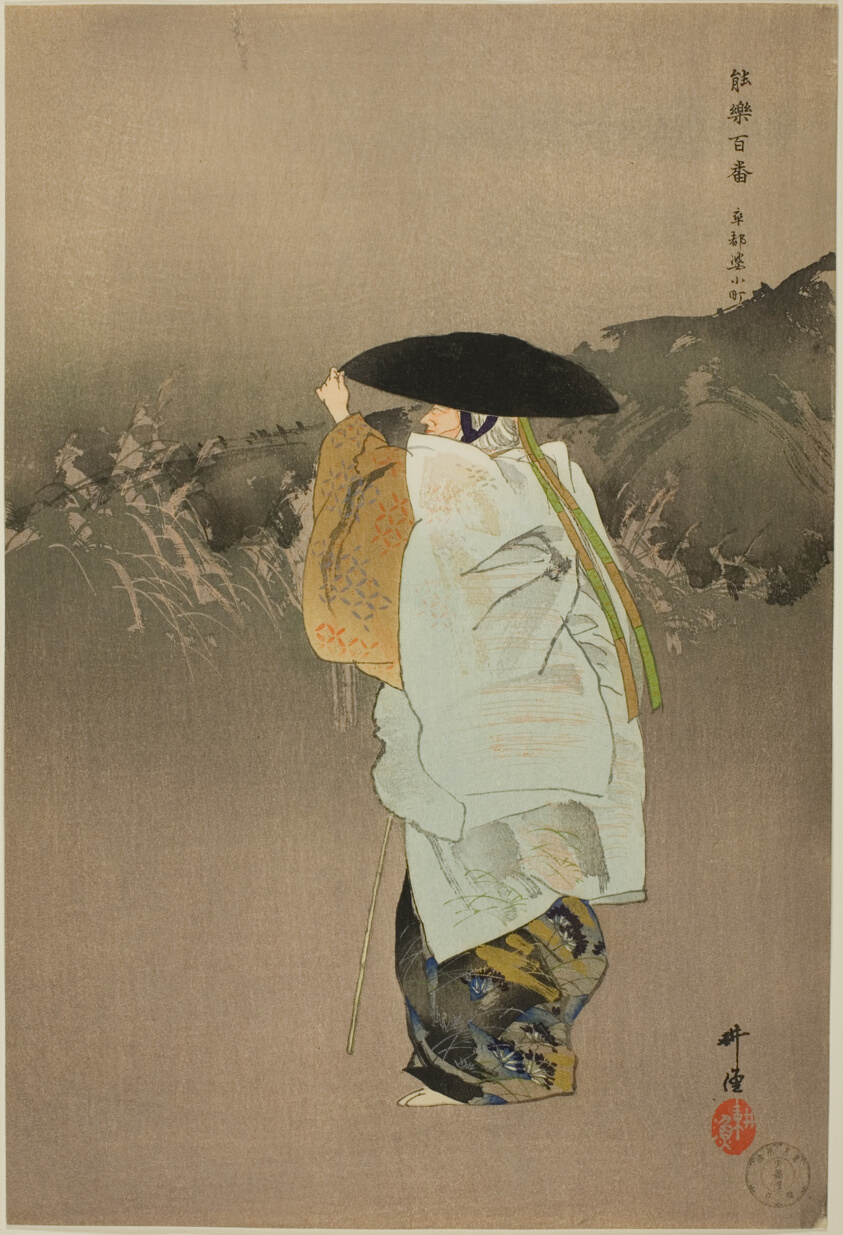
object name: Print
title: Sotoba Komachi, from the series "One Hundred No Dramas (Nogaku hyakuban)"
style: Japanese (culture or style)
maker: Tsukioka Kogyo; Japanese, 1869-1927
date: 1898/1903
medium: Color woodblock print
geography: Japan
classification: woodblock print; print; asian art